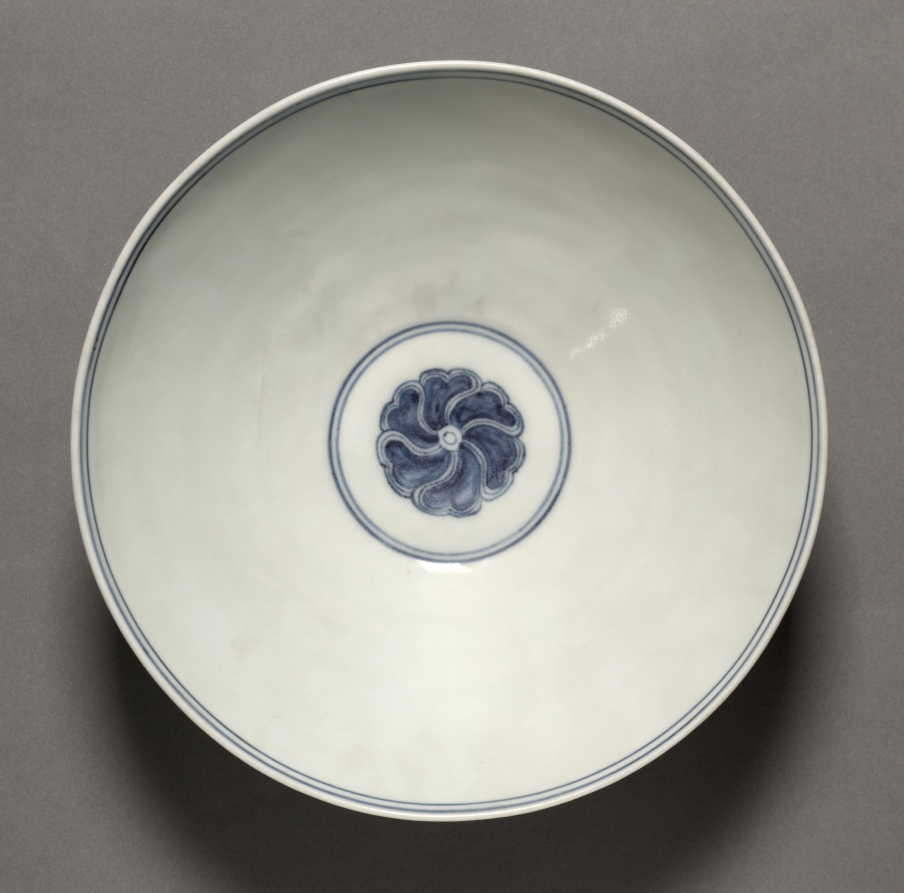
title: Bowl with Peony Decoration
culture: China, Ming dynasty (1368-1644), Xuande mark and reign (1425-1435)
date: 1426–35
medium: porcelain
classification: Ceramic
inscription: 大明宣德年製